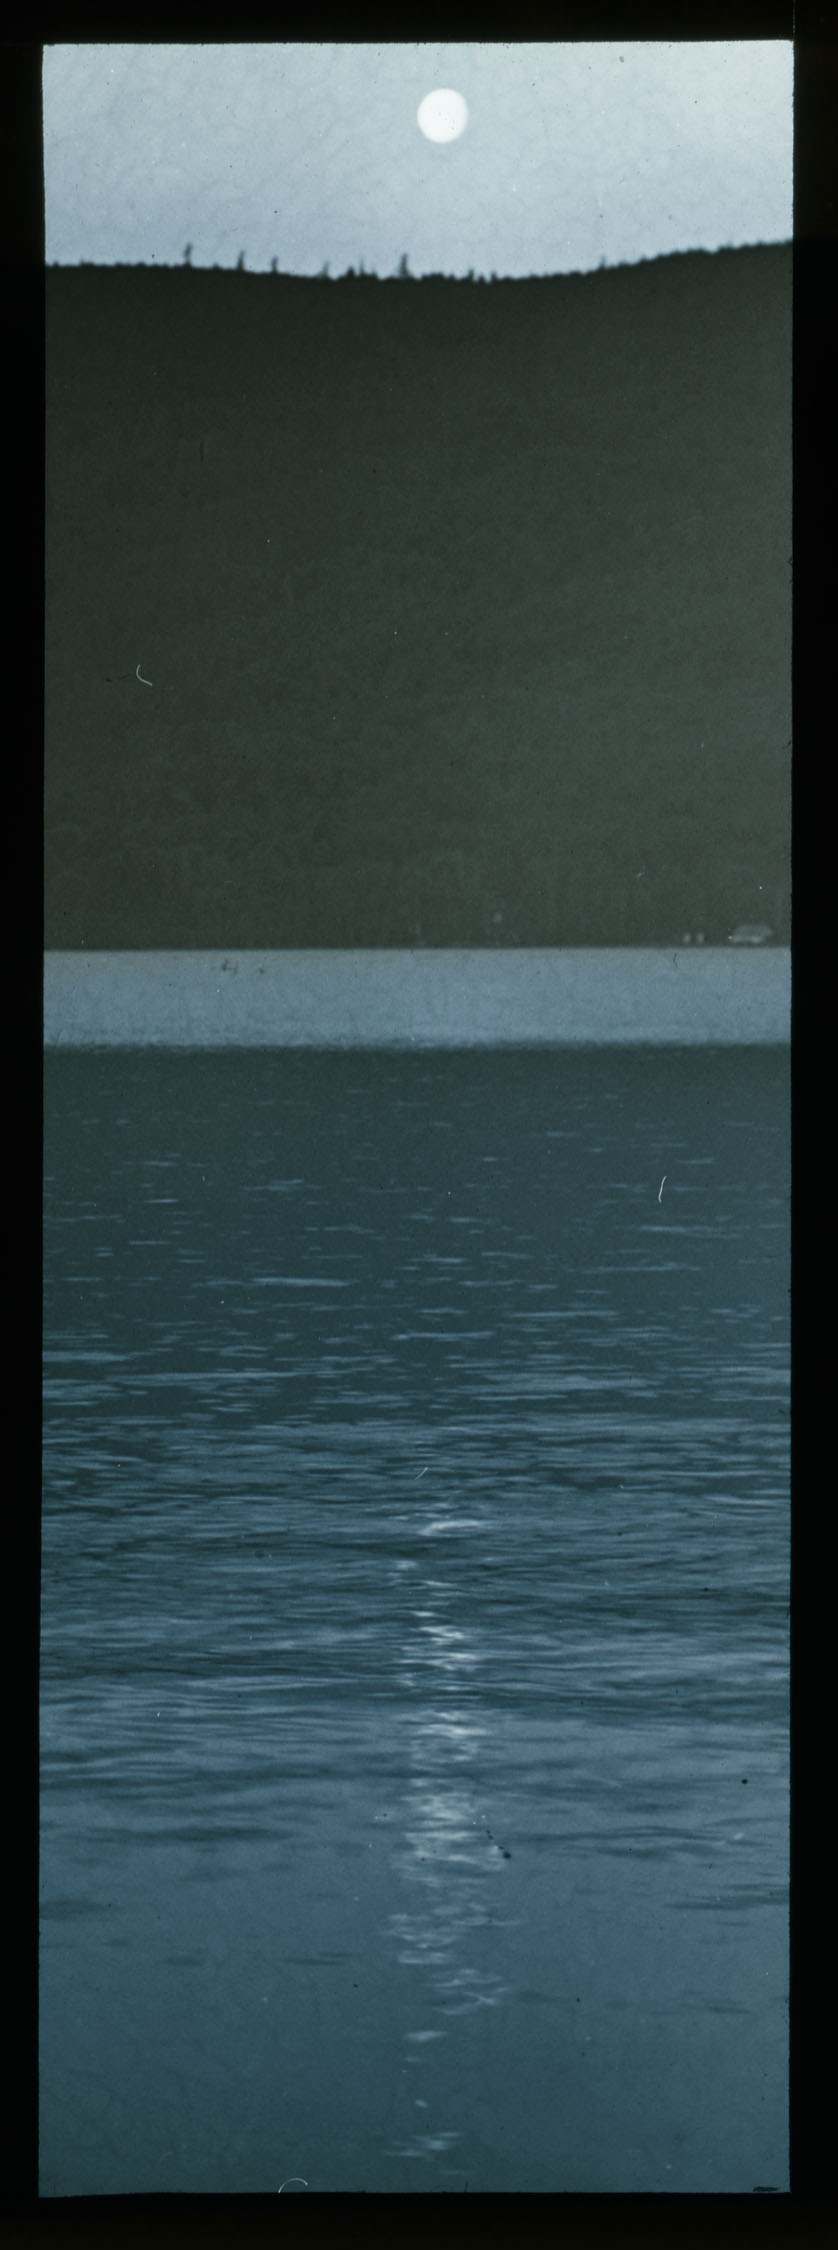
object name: Photograph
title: Meeting of Day and Night, Lake George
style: Pictorialism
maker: Alfred Stieglitz (American, 1864–1946)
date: 1896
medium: Lantern slide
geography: United States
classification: lantern slide (glass); negative/transparency; photography; photograph